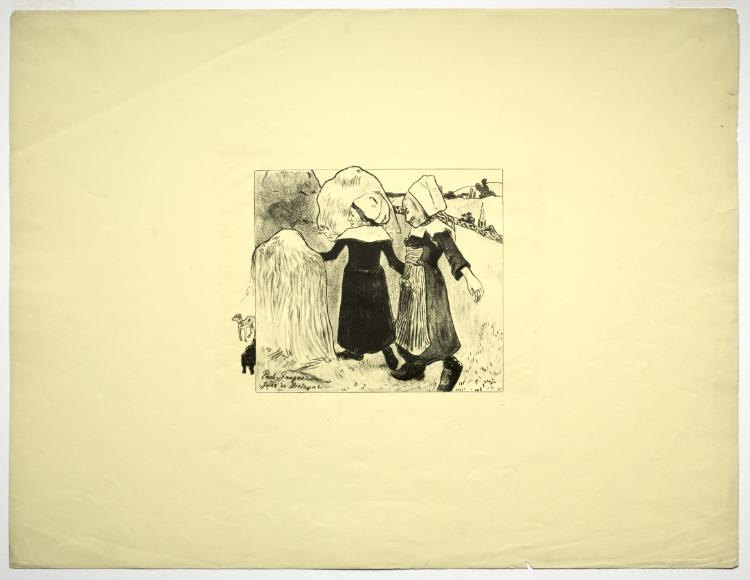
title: Volpini Suite: Joys of Brittany (Joies de Bretagne)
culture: France, 19th century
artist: Paul Gauguin (French, 1848–1903)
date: 1889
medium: zincograph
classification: Print